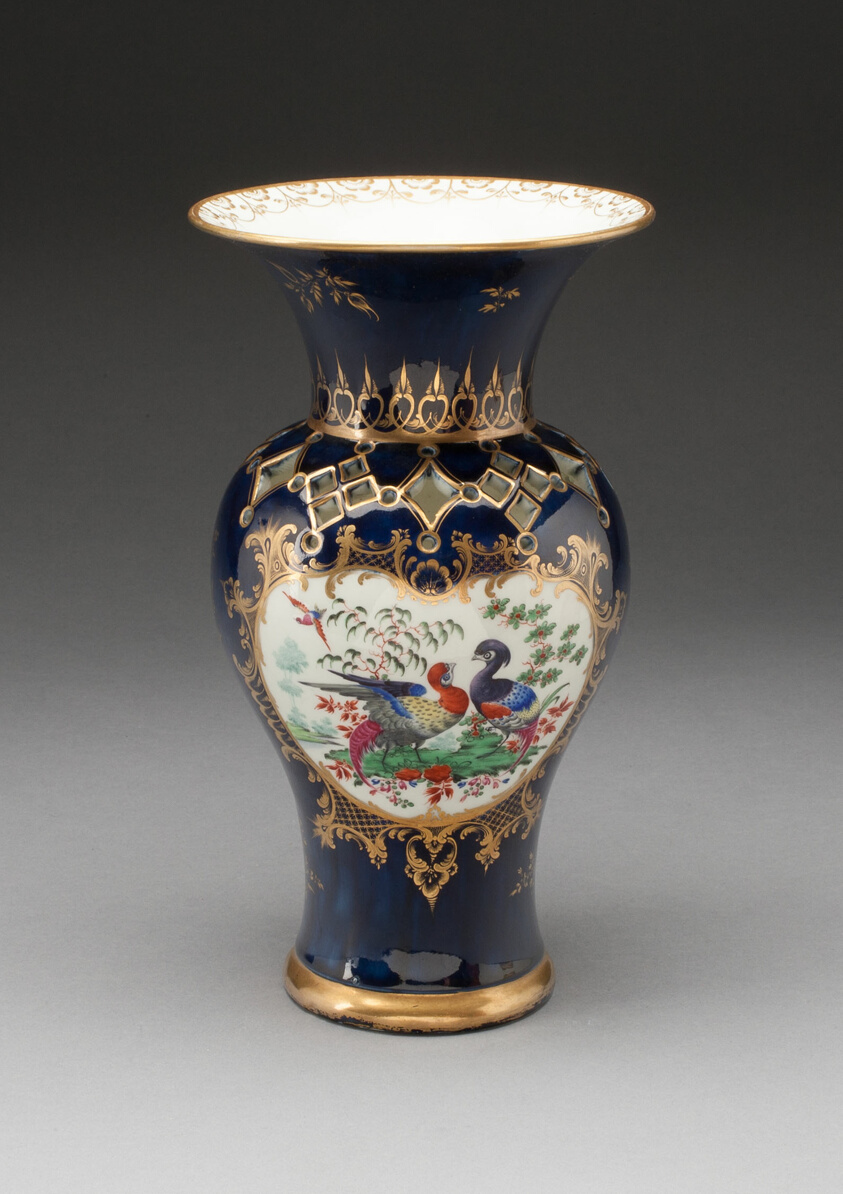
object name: Ceramics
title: Vase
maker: Worcester Porcelain Factory (Warmstry House Period, 1751–1783); Worcester, England, founded 1751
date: c. 1770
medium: Soft-paste porcelain, underglaze blue, polychrome enamels and gilding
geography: Worcester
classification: vase; vessel; porcelain; ceramics; european decorative arts